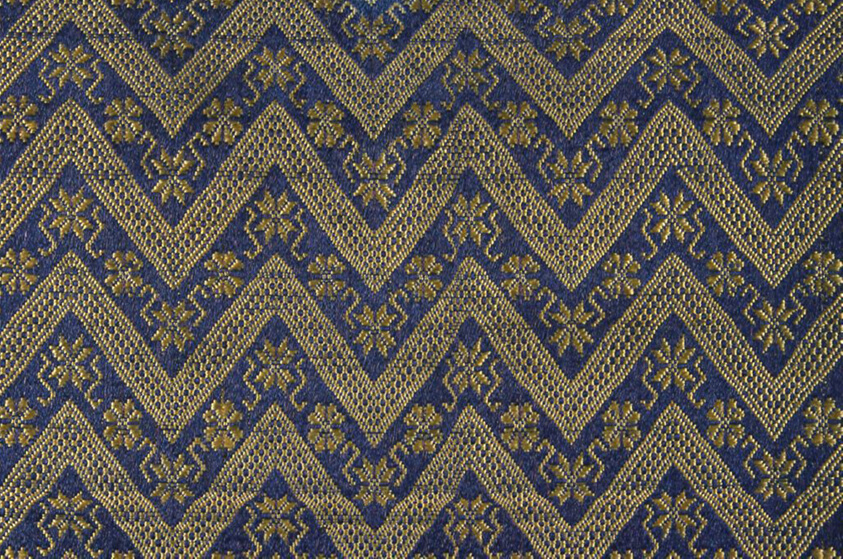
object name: Textile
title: Panel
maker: Italy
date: 1625/75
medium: Silk, warp-float faced satin weave self patterned by ground wefts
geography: Italy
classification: textile; weaving